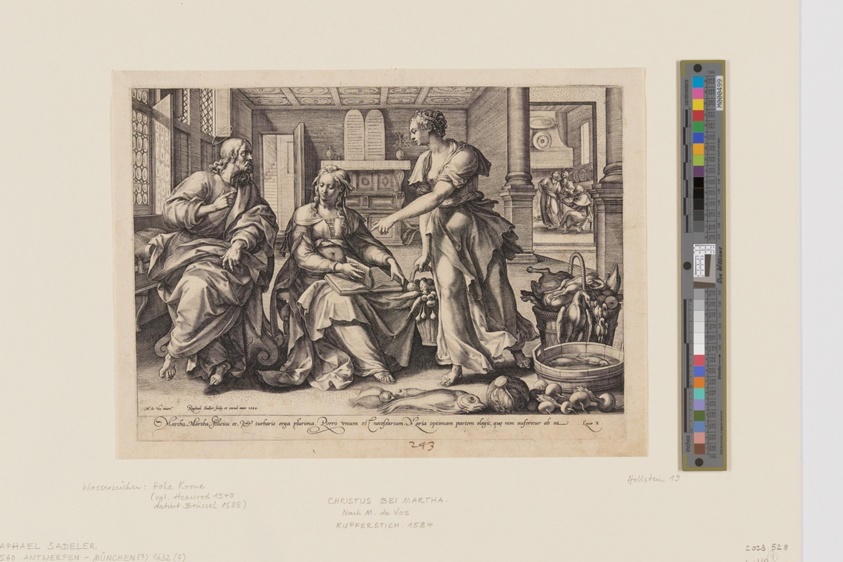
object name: Print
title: Christ in the House of Martha and Mary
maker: Raphael Sadeler I (Flemish, 1560/61–1628/32); after Maarten de Vos (Flemish, 1532–1603)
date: 1584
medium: Engraving on ivory laid paper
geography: Flanders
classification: engraving; paper; print; prints and drawing